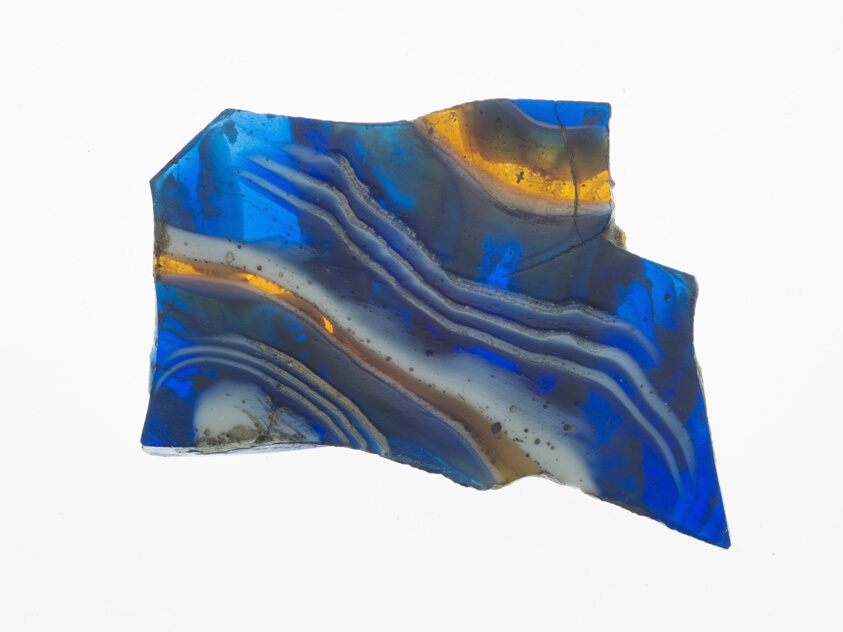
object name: Decorative Arts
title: Bowl Fragment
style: roman (ancient, style or period), ancient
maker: Roman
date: 1st century BCE-1st century CE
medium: Glass, ribbon technique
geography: Roman Empire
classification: fragment; bowl; decorative arts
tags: decoration